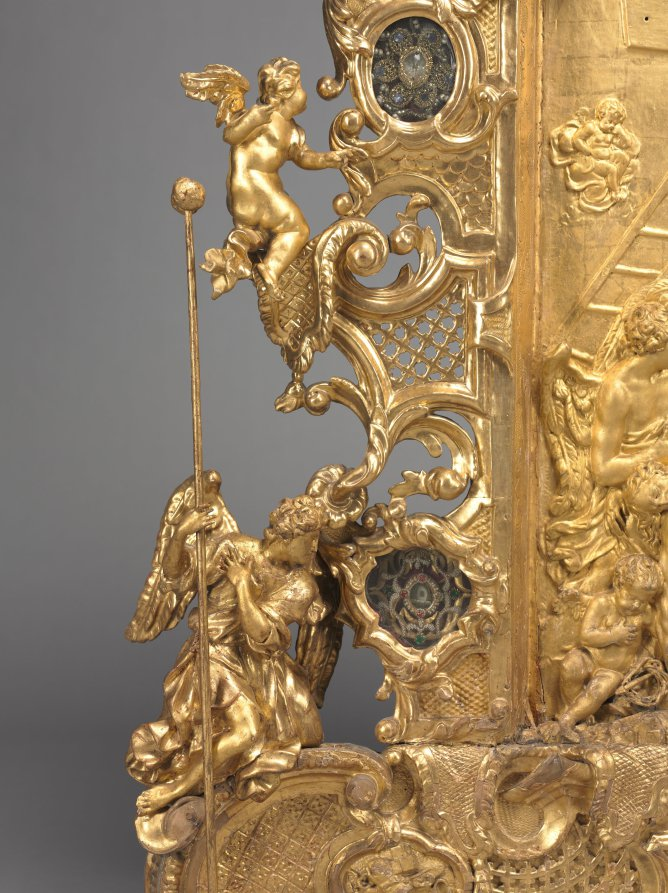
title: Altarpiece with Relics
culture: Germany, Bavaria, 18th century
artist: Joseph Matthias Götz (German, 1696–1760)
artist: and Workshop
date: c. 1735–40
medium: gilded wood, with relics in niches: gilded wood, mother-of-pearl, ebony, red silk, gold wire, seed pearls, rock crystal, pen and ink on paper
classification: Sculpture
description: Götz covers every surface in gold leaf, giving each part of the object equal importance, rather than simply framing a central picture. In this distinctively Central European approach, figural narrative is subordinate to the overall ensemble. Götz designed this object to rest on top of an altar, probably in front of a larger painted or sculpted decorative scheme. The work contains relics seen through the small windows on the perimeter. These small remains of holy figures demonstrate the persistence of a medieval Catholic tradition well into the 1700s.